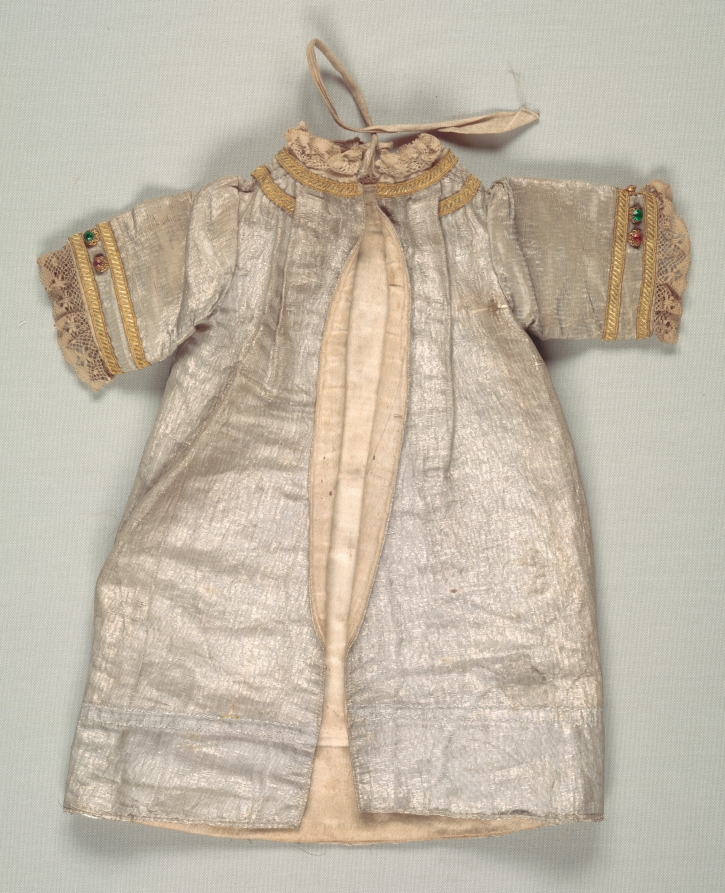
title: Baby's Robe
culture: Spain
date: 1600s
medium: plain weave silk with silver metal thread weft; embroidered with gold and silver metal thread, spangles, and colored glass stones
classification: Garment